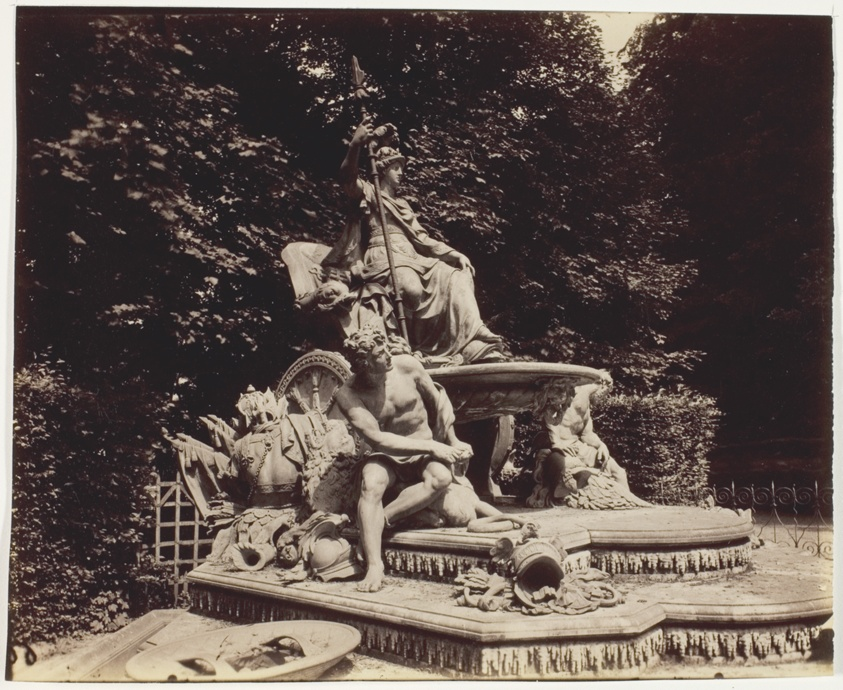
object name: Photograph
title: Versailles, Bosquet de l'Arc de Triomphe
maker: Jean-Eugène-Auguste Atget (French, 1857–1927)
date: 1901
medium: Albumen print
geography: France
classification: albumen silver print; photographic process; photography; photograph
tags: Collected by Hugh Edwards